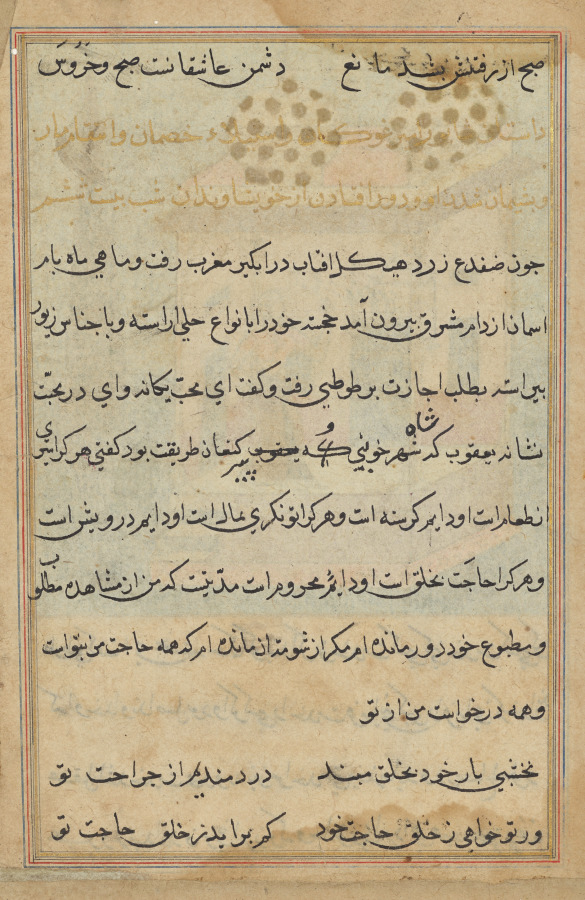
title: Page from Tales of a Parrot (Tuti-nama): text page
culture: Mughal India, court of Akbar (reigned 1556–1605)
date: c. 1560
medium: gum tempera, ink, and gold on paper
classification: Painting